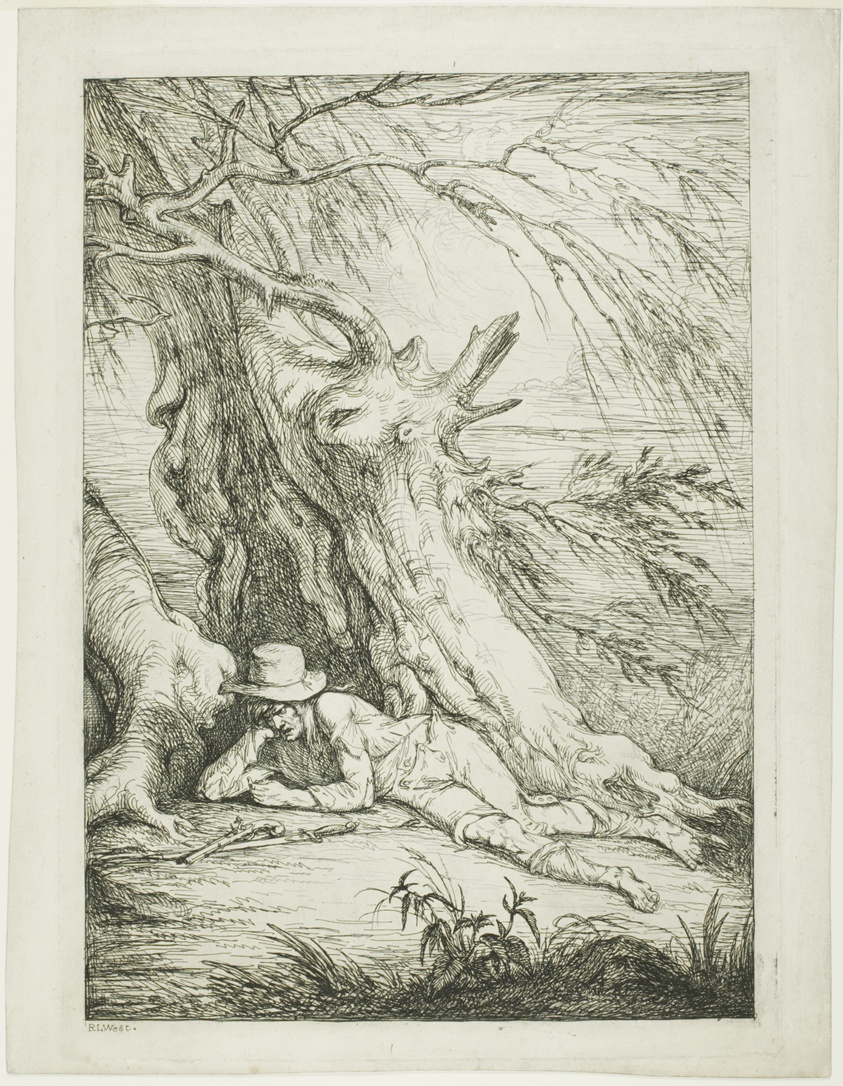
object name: Print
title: Brigand Lying Under a Tree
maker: Raphael Lamar West (American, 1766-1850)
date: c. 1785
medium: Etching in black on ivory laid paper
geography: United States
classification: etching; print; prints and drawing